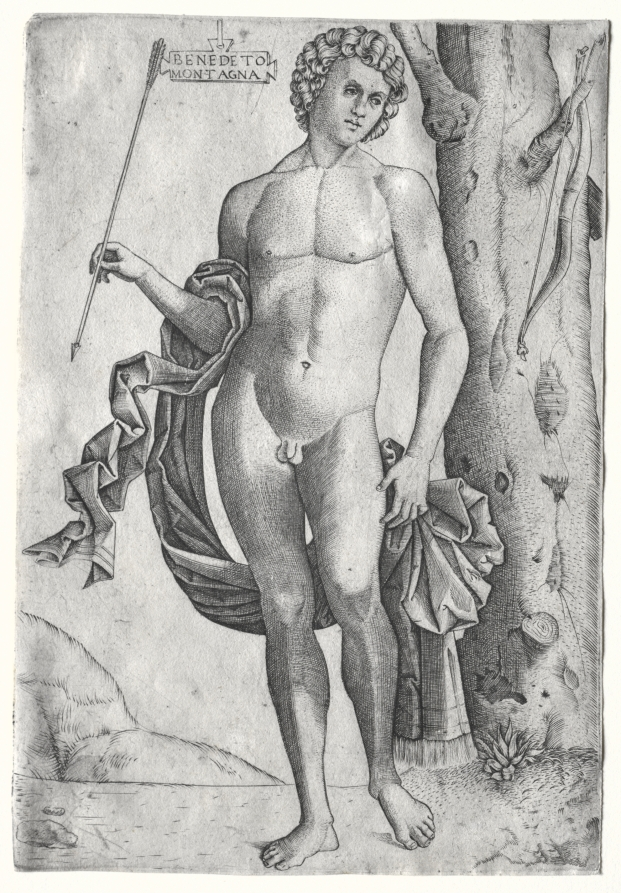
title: Man with an Arrow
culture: Italy, 16th century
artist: Benedetto Montagna (Italian, c. 1481–1555/58)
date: c. 1515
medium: engraving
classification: Print